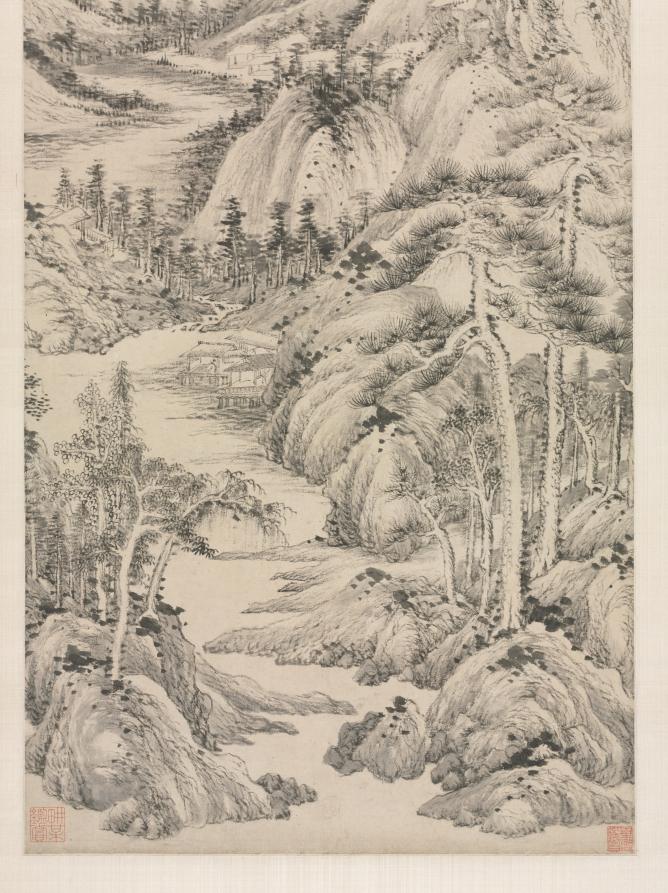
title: Shade of Pines in a Cloudy Valley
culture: China, Qing dynasty (1644-1911)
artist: Wang Jian (Chinese, 1598–1677)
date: 1660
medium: Hanging scroll; ink on paper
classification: Painting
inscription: Artist's inscription, signature, and seal: Painted at Yiyage in imitation of Wang Meng's Shade of Pines in a Cloudy Valley during the Qingming Festival of the gengzi year [1660]. Wang Jian [seal] Wang Jian zhi yin.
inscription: 2 additional seals: 1 of Bi Long 畢瀧 (18th c.); 1 unidentified.